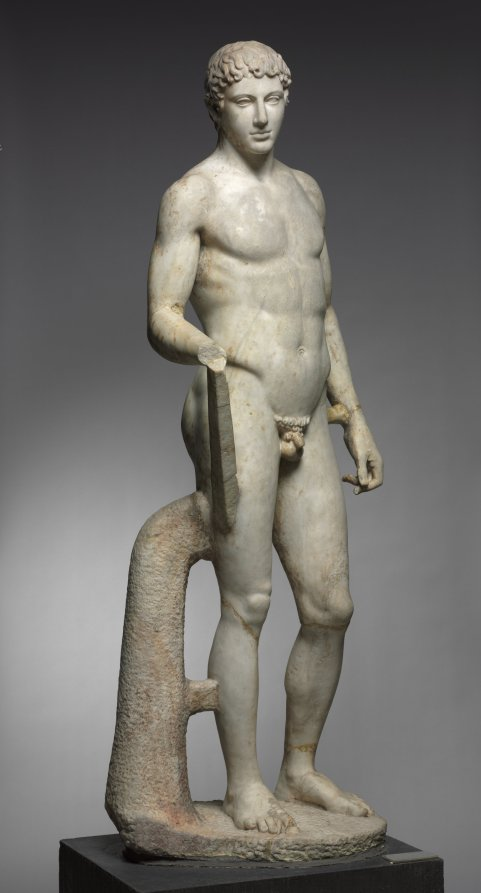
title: Statue of an Athlete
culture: Italy, Roman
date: 1–100 CE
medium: marble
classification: Sculpture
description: This idealized athlete recalls Greek sculptural types invented and popularized during the 400s BC. Large-scale athletes and other sculptures like this were originally created by famous artists as sanctuary dedications. Centuries later, they were widely copied and adapted by Roman sculptors, whose clients sought their own versions of earlier masterpieces. Working in marble rather than bronze, these sculptors added certain elements for stability, such as the struts and the large tree trunk beside the right leg here. Sculptures like this one are profoundly complex, made by and for Romans but descended from Greek ancestors.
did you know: For many years, this sculpture stood in the rotunda of the Cleveland Museum of Art.